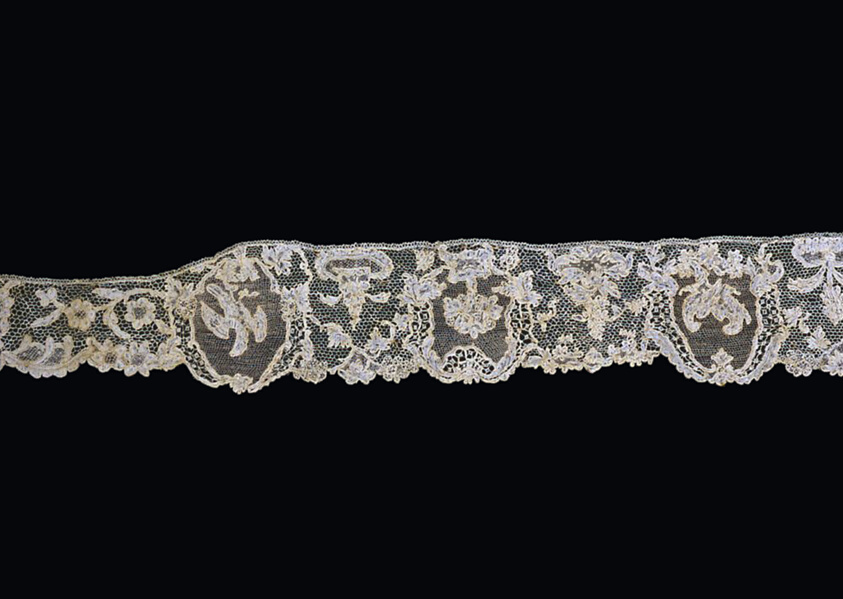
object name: Textile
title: Border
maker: France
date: 1725/75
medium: Linen, needle lace of a type known as "Point d'Argentan" with buttonholed mesh ground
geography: France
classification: textile; lace - needle